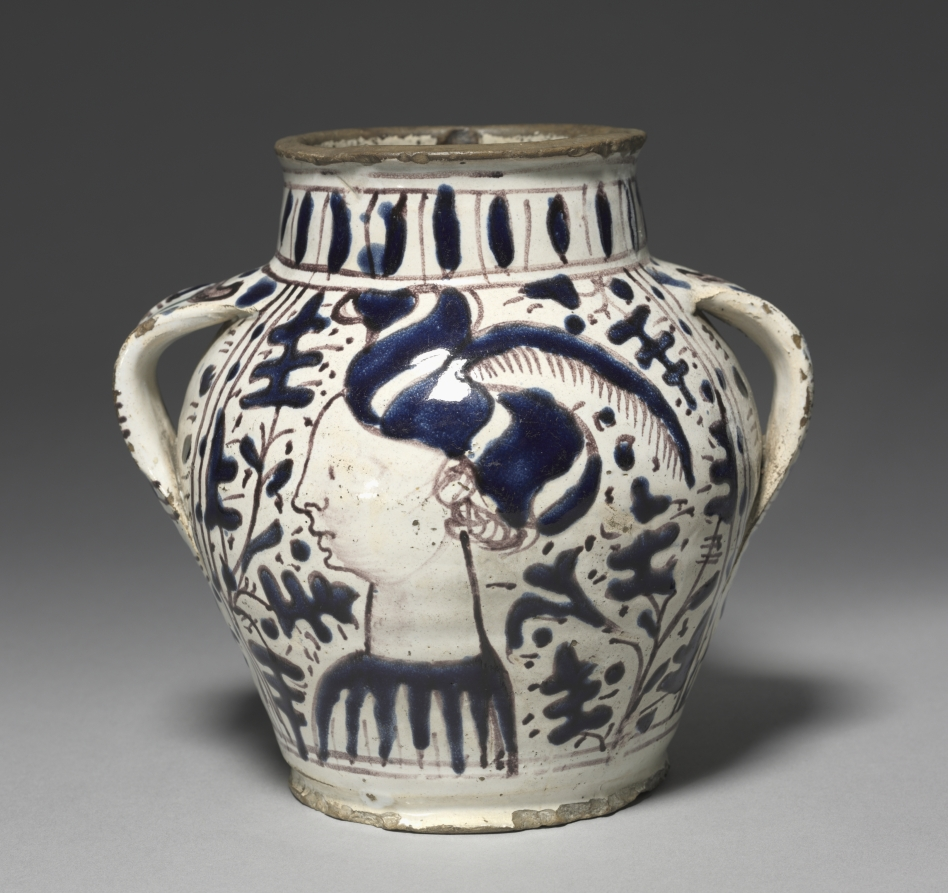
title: Two-Handled "Oak Leaf" Drug Jar with Male and Female Portraits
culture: Italy, Florence, 15th century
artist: workshop of Giunta di Tugio (Italian, c. 1382–1450)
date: 1431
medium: tin-glazed earthenware (maiolica)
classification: Ceramic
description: This two-handled drug container with a bulbous body and short neck belongs to a group of wares known as "oak leaf jars" because of their decoration. This example includes two profile busts amid blue-on-white oak leaves on branching stems. On each handle is a crutch, painted in green and manganese. This was the badge of the Hospital of Santa Maria Nuova in Florence. The star motif below the crutch is the workshop mark of the ceramist Giunta di Tugio, known to have received this commission in the year 1431. In the early Middle Ages hospitals were simple hospices set up outside cities to offer food and lodging to pilgrims and travelers. The Santa Maria Nuova hospital, by the mid-1300s the largest in Florence, was the first hospital in that city dedicated primarily to caring for the sick.